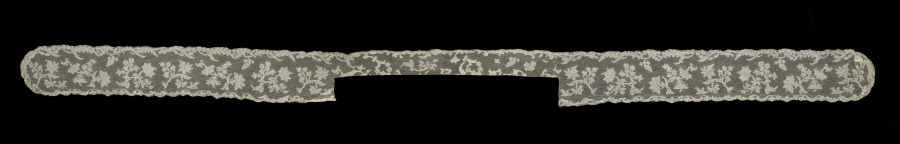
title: Lace Lappet and Edging for Cap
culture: France, Valenciennes or Flanders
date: 1700s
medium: Linen: bobbin lace (Valenciennes)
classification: Lace